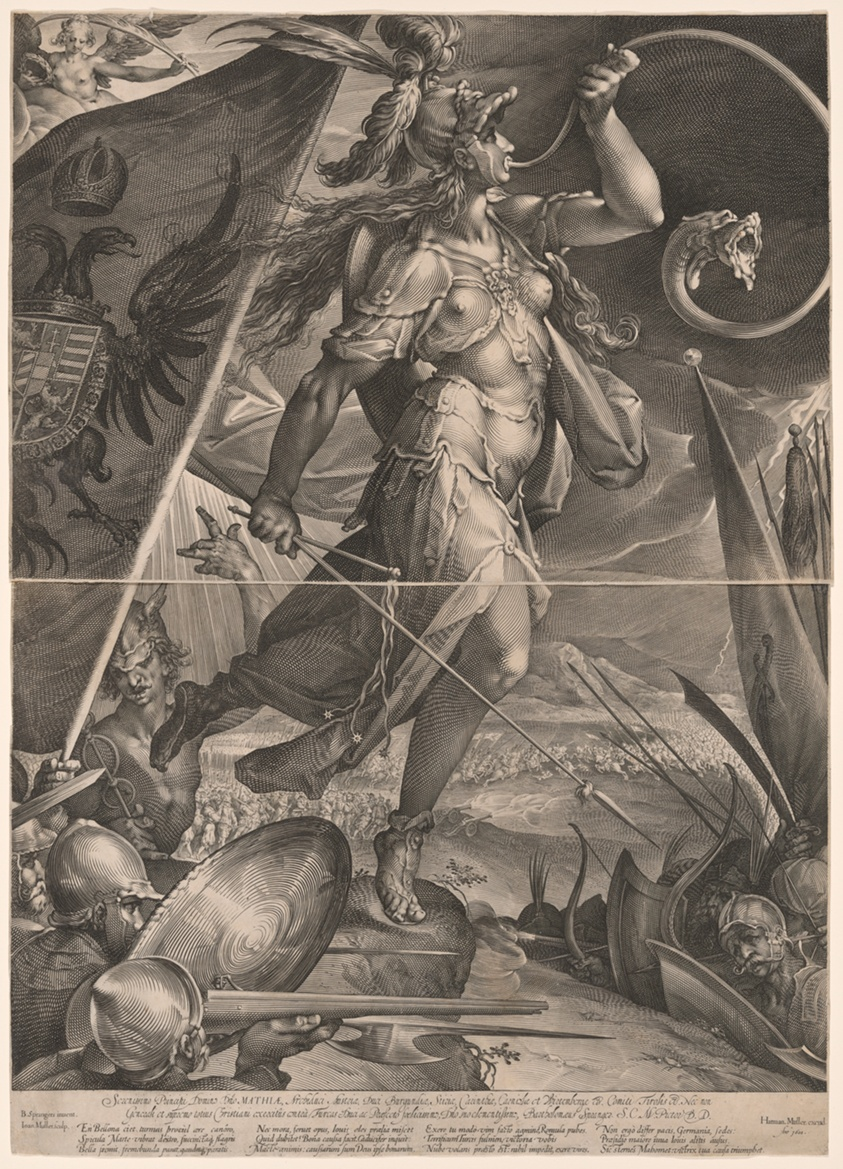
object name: Print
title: Bellona Leading the Imperial Armies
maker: Jan Harmensz Muller (Dutch, 1571–1628); after Bartholomeus Spranger (Flemish, 1546–1611)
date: 1600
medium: Engraving on two sheets of ivory laid paper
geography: Netherlands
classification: engraving; paper; print; prints and drawing